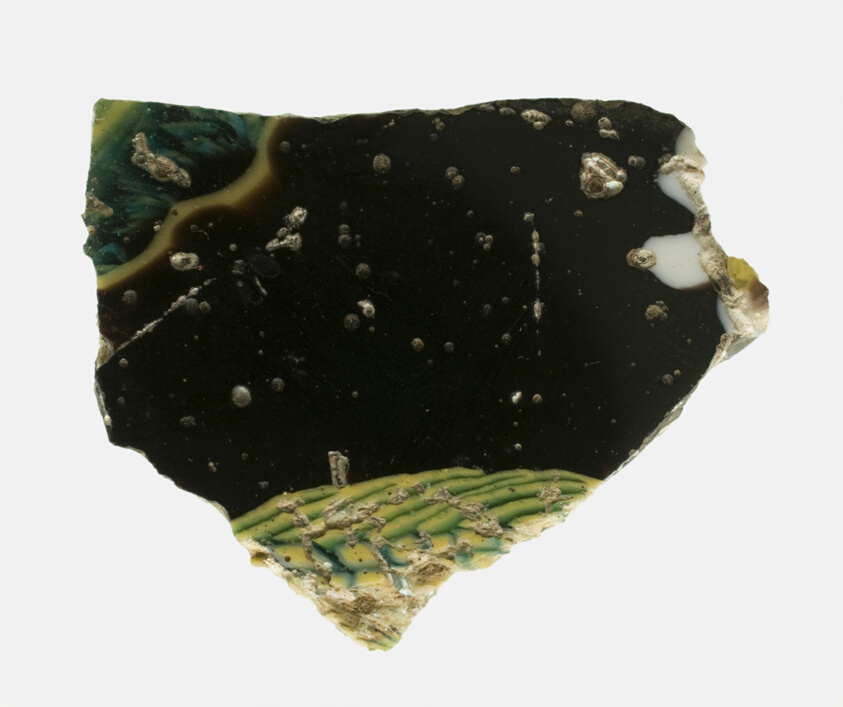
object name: Decorative Arts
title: Fragment of a Floral Inlay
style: ptolemaic, greco-roman (egyptian)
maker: Egyptian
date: Ptolemaic Period, 1st century BCE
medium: Glass, mosaic technique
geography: Egypt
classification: fragment; decorative arts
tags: decoration, flowers, floral